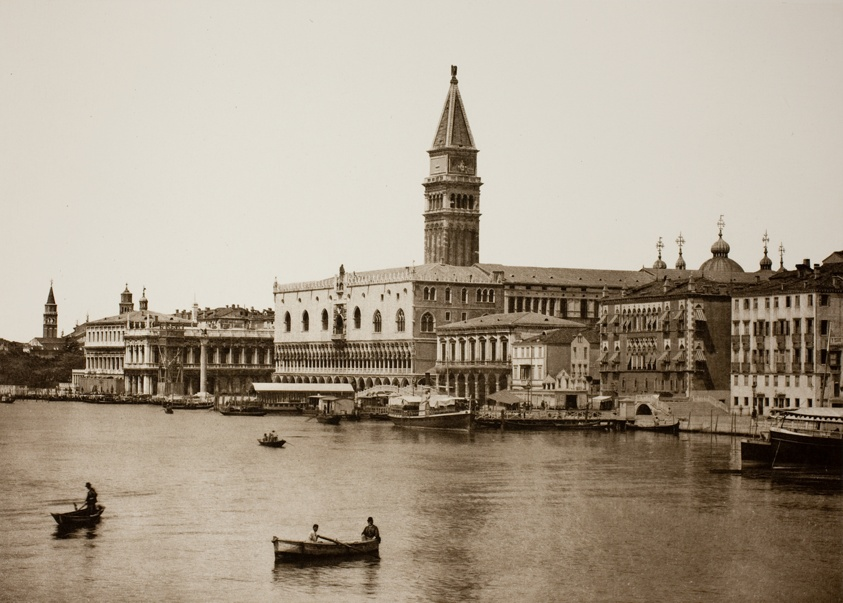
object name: Photograph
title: Untitled (99)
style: 19th century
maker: edited by Ferdinando Ongania; Italian, 1842–1911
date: c. 1890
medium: Photogravure, No. 99 from the portfolio "Calli, Canali e Isole della Laguna"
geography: Italy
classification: photograph; photography